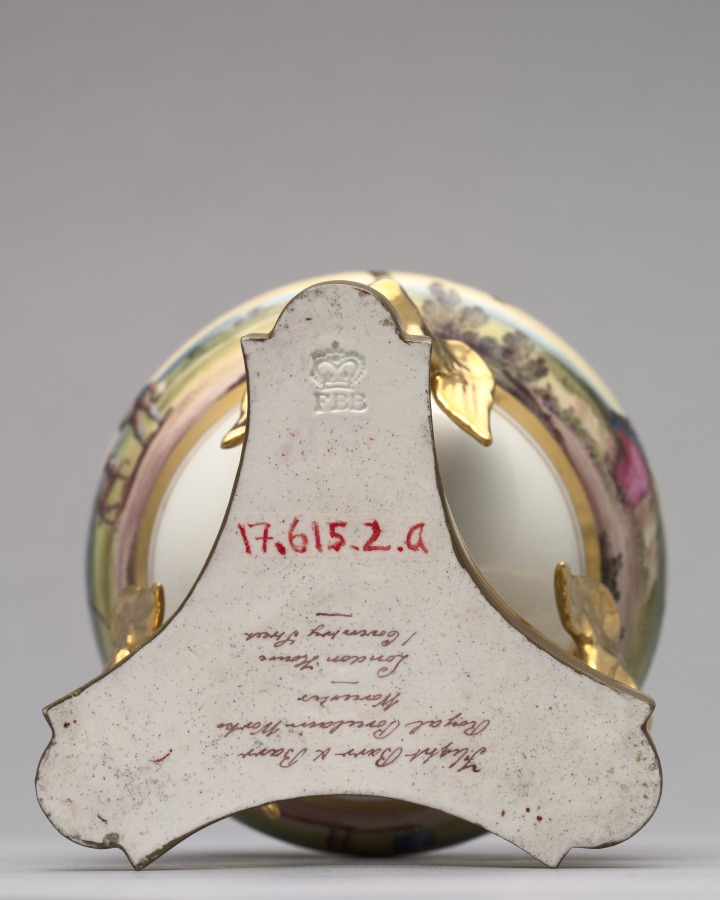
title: Urn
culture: England, Worcester, 19th century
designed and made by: Flight, Barr and Barr (British)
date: c. 1815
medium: artificial porcelain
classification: Ceramic